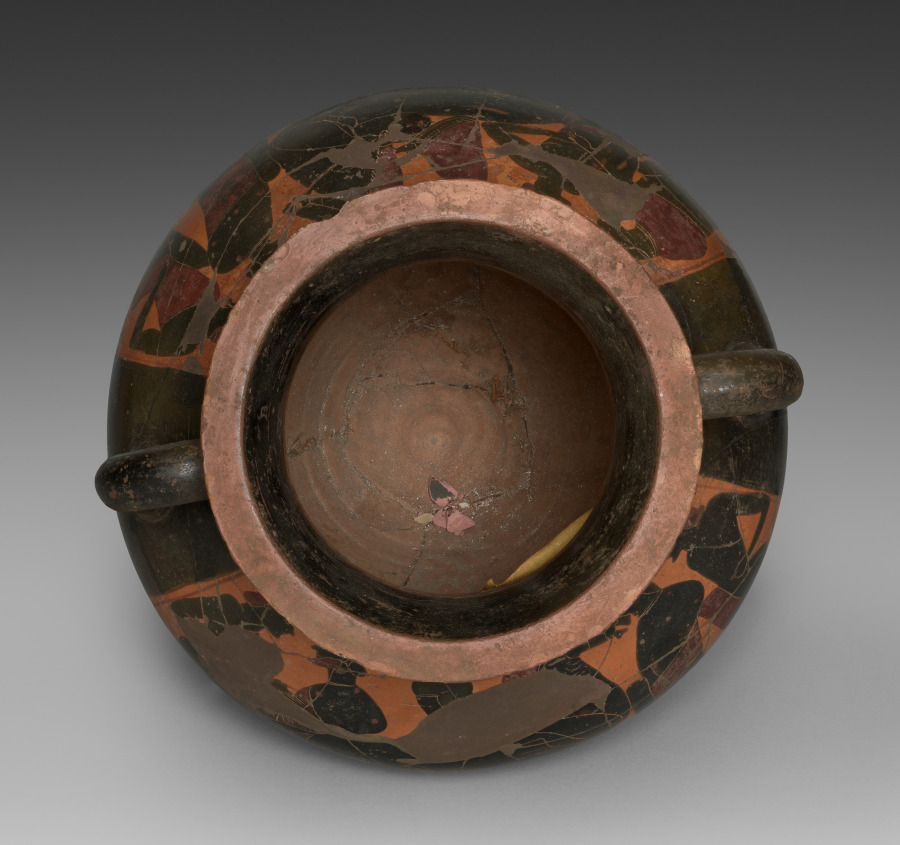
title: Black-Figure Amphora (Type B; Storage Vessel): Men and Horses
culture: Greek, Attic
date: c. 540 BCE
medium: ceramic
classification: Ceramic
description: Although pieced together from many fragments (with some still missing), this sizeable amphora remains impressive. On each side, a horsemen and four figures are contained within a large, reserved panel beneath a lotus-palmette frieze. The scenes, which differ slightly from one another in various details, cannot be identified with known historical or mythological figures or episodes.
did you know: The two sides of this amphora are very similar—a horseman flanked by pairs.